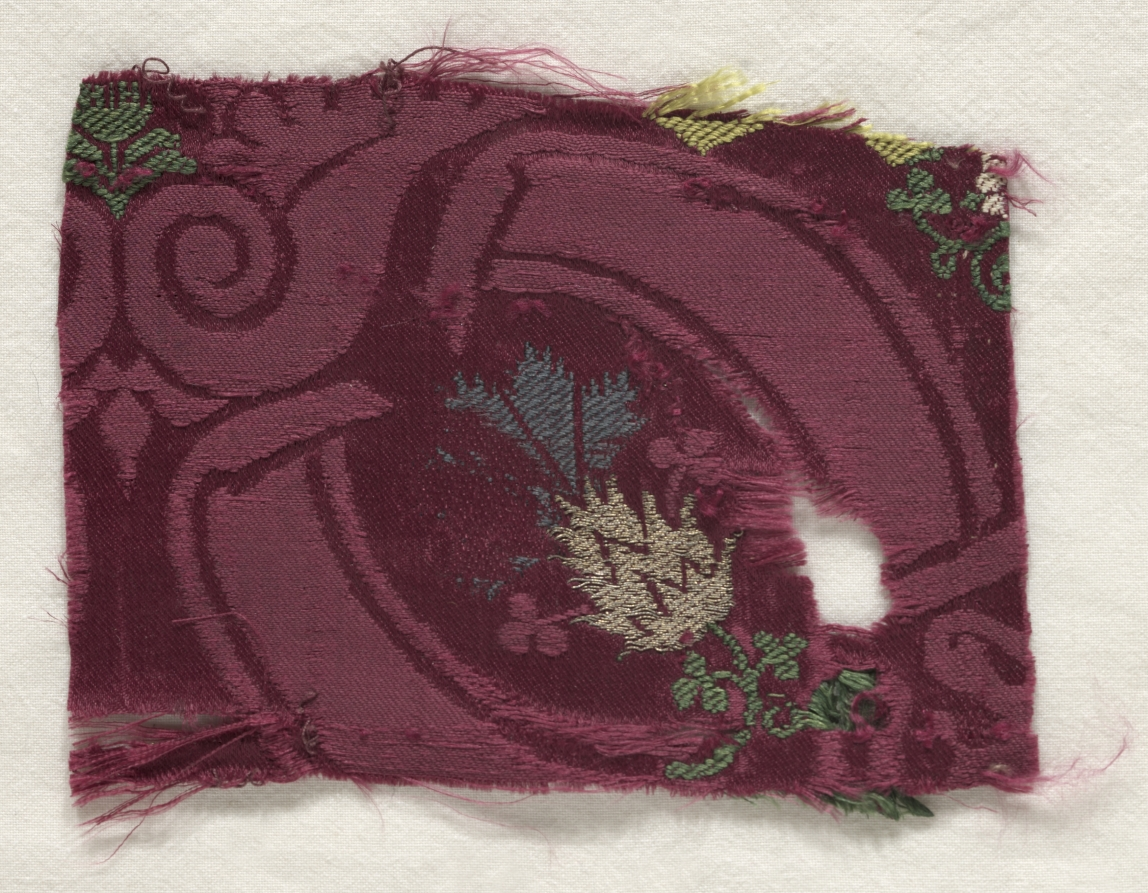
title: Fragment of Silk Textile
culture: Spain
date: 1700s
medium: plain cloth, brocaded; silk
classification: Textile